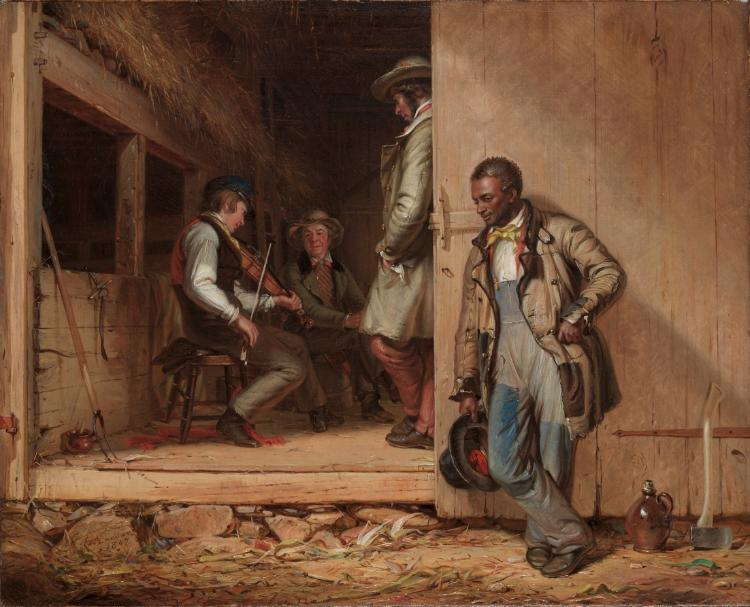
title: The Power of Music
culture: America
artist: William Sidney Mount (American, 1807–1868)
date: 1847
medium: oil on canvas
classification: Painting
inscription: signed lower left: Wm S. MOUNT. / 1847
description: Set in rural Long Island before the Civil War, Mount's complex painting presents an African American laborer listening intently to a fiddle tune enjoyed by white men. While a love of music unites the figures in a bond of shared humanity, the two races occupy different spaces--one inside, one outside, both separated by a barn door--effectively symbolizing the pronounced divisions in America at the time.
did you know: Mount was an accomplished fiddle player and even patented a new design for the instrument.